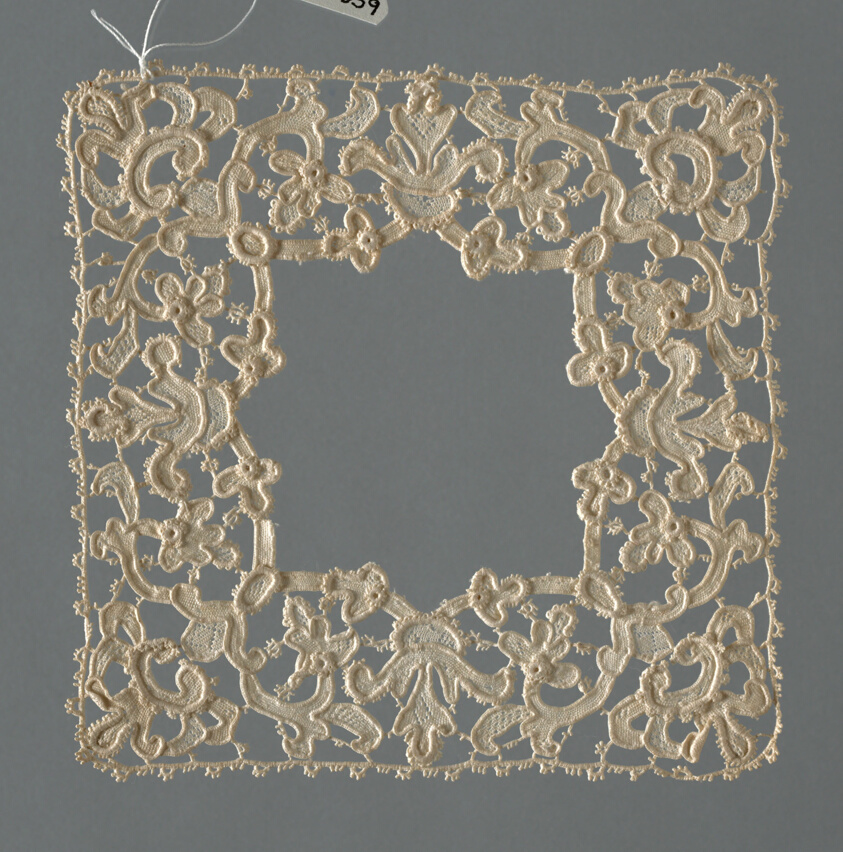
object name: Textile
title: Chalice Cover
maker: Italy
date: 1675/1700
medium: Linen, needle lace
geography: Italy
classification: lace - needle; lace; textile